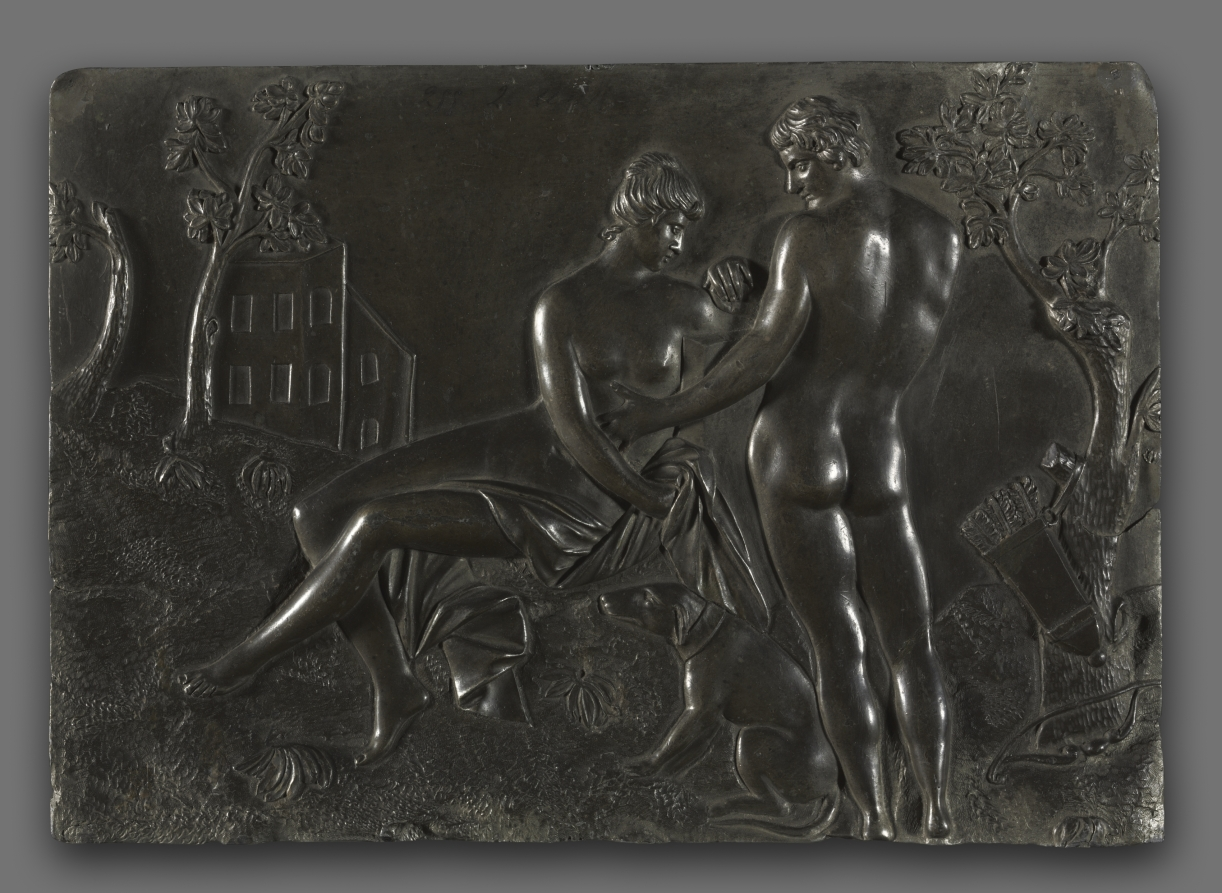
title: Venus and Adonis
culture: Austria, Vienna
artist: follower of Georg Raphael Donner (Austrian, 1693–1741)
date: mid-1700s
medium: lead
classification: Sculpture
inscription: inscribed in ink on top edge: 299.2.US [?] A [?].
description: Venus, the goddess of love, fell in love with the mortal Adonis. Here she urges him not to pursue the dangerous sport of hunting boar, advice he ignored, eventually leading to his death.